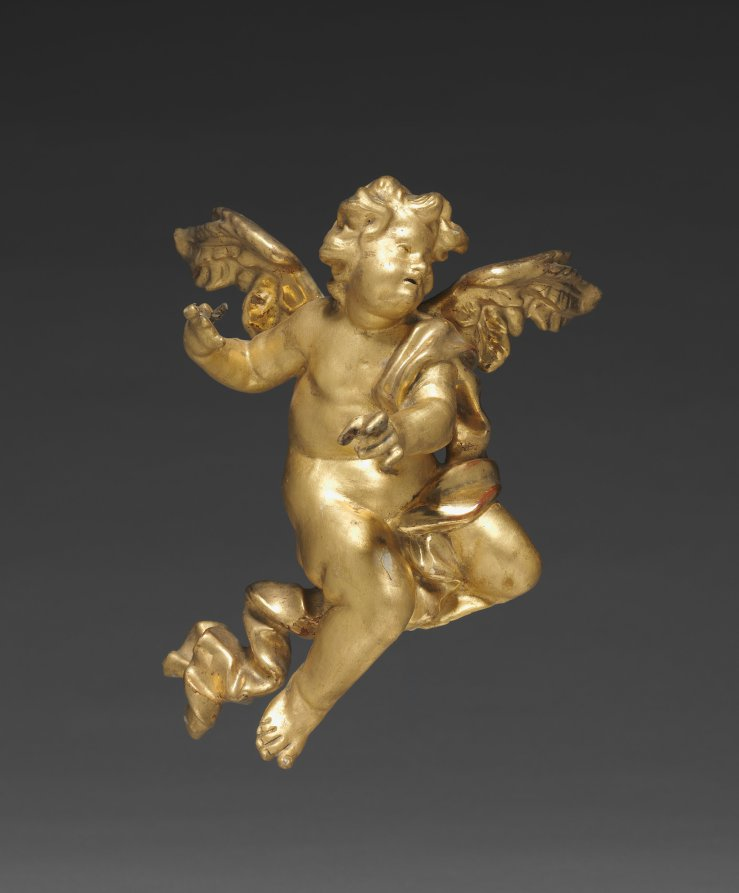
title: Altarpiece with Relics - Putto, middle left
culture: Germany, Bavaria, 18th century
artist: Joseph Matthias Götz (German, 1696–1760)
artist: and Workshop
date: c. 1735–1740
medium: gilded wood, with relics in niches: gilded wood, mother-of-pearl, ebony, red silk, gold wire, seed pearls, rock crystal, pen and ink on paper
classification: Sculpture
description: Götz covers every surface in gold leaf, giving each part of the object equal importance, rather than simply framing a central picture. In this distinctively Central European approach, figural narrative is subordinate to the overall ensemble. Götz designed this object to rest on top of an altar, probably in front of a larger painted or sculpted decorative scheme. The work contains relics seen through the small windows on the perimeter. These small remains of holy figures demonstrate the persistence of a medieval Catholic tradition well into the 1700s.